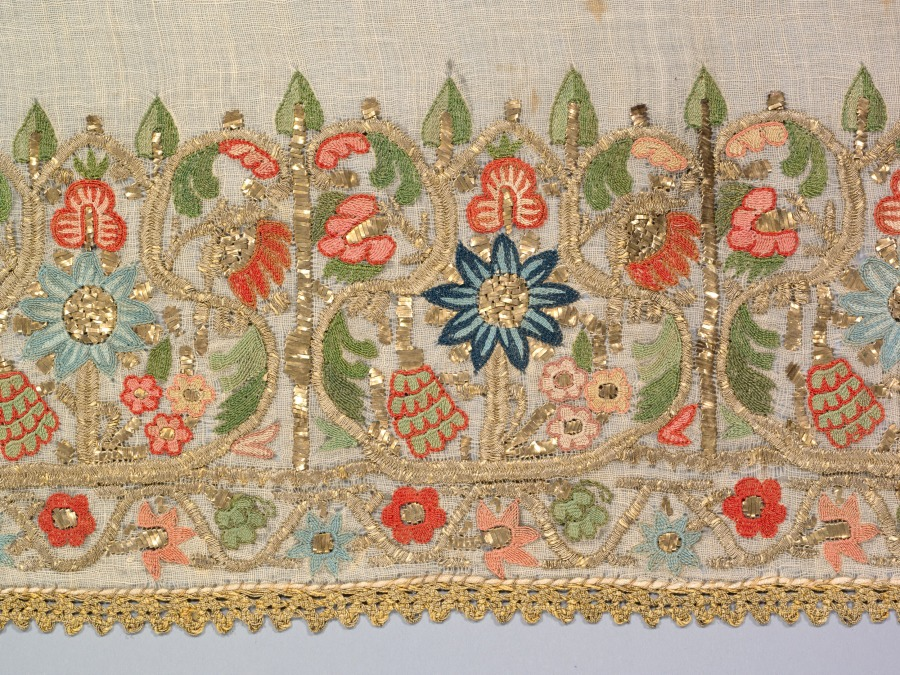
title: Embroidered towel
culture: Turkey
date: 1800s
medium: plain weave: linen; embroidery, double-running stitch: silk, gilt-metal strips and thread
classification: Embroidery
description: Fine Turkish towels with beautiful floral decoration embroidered across each end are often reversible, and their quality revealed the owner’s wealth and status. A lady was required by Turkish etiquette to use a napkin “daintily over the tips of her fingers,” lest she lose her social standing. Towels were not only essential components of everyday life but also gifts, prizes, and decorations. Embroideries could also depict images of daily life. Colorful tents and buildings in floral landscapes, here enriched with shiny gilt-metal strips, adorn the four sides of a head scarf that was worn either folded or unfolded and fastened beneath the chin. Square embroideries also served to wrap gifts, letters, and objects; the 19th-century English traveler Charles White commented that “no present is made . . . unless folded in a handkerchief, embroidered cloth, or piece of gauze. The more rich the envelope, the higher the compliment to the receiver.”